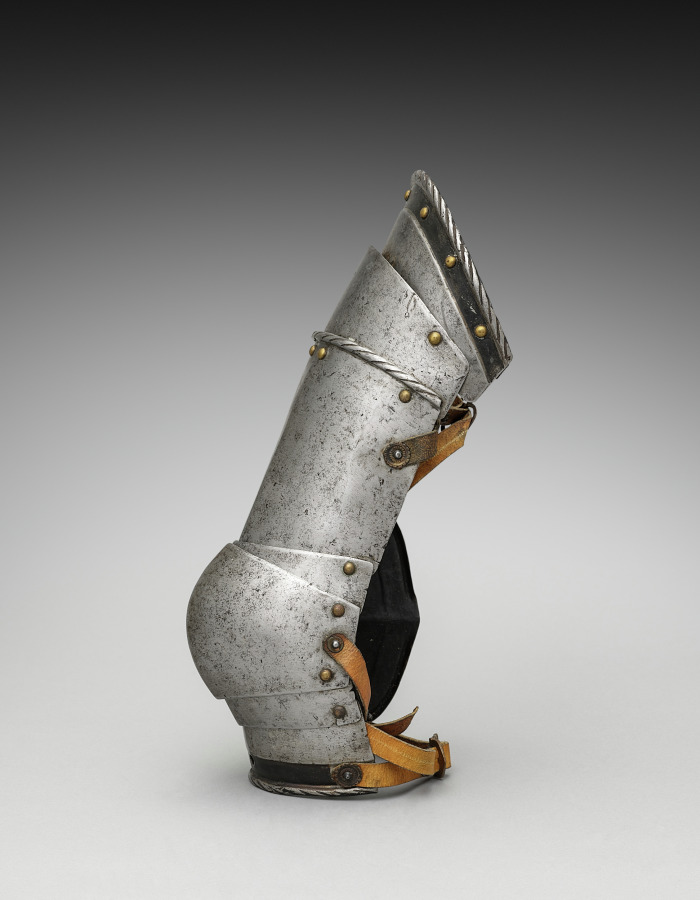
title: Right Cuisse with Poleyns (knee-cops)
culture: Germany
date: c.1550–1570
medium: iron, steel, leather and brass rivets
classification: Arms and Armor